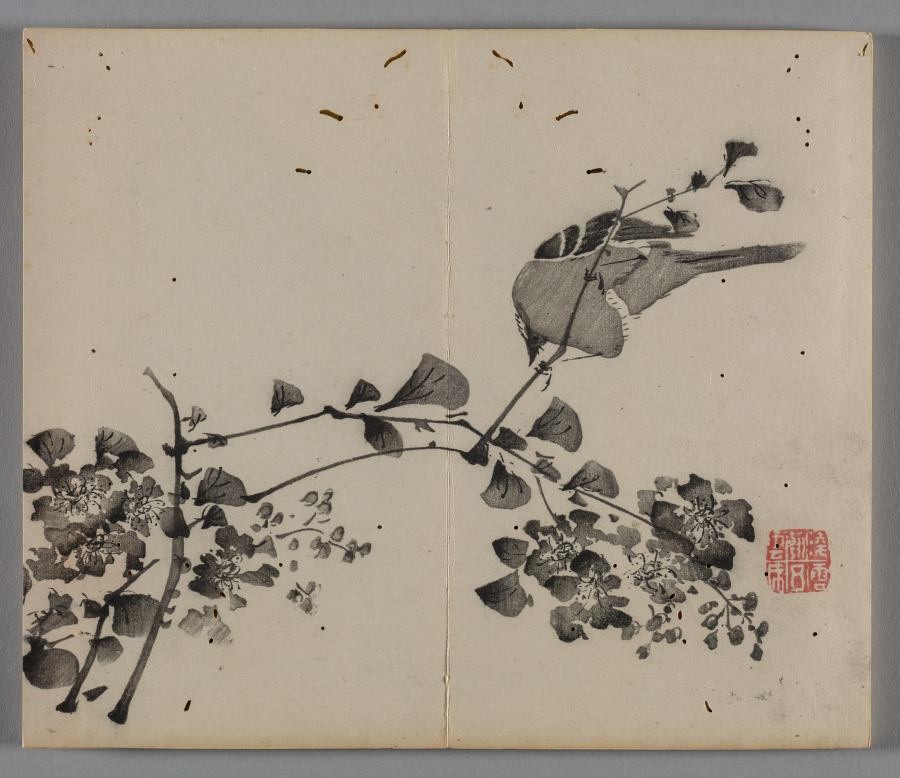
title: Ten Bamboo Studio Painting and Calligraphy Handbook (Shizhuzhai shuhua pu): Birds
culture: China, Qing dynasty (1644-1911)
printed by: Hu Zhengyan (Chinese, c. 1584–1674)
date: 1633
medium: Woodblock-printed book; ink and colors on paper; first edition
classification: Print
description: Color printing reached a level of perfection in the early 1600s, as seen in this Ten Bamboo Studio Collection of Calligraphy and Painting and the Mustard Seed Garden Manual of Painting (printed 1679 and 1701). The painterly quality, precision in registering (aligning) the woodblocks, and harmonious colors made them the most successful color print editions in Chinese history. Both editions were printed and compiled in Nanjing, spread nationwide, and had a great impact on the arts in Japan and Korea.